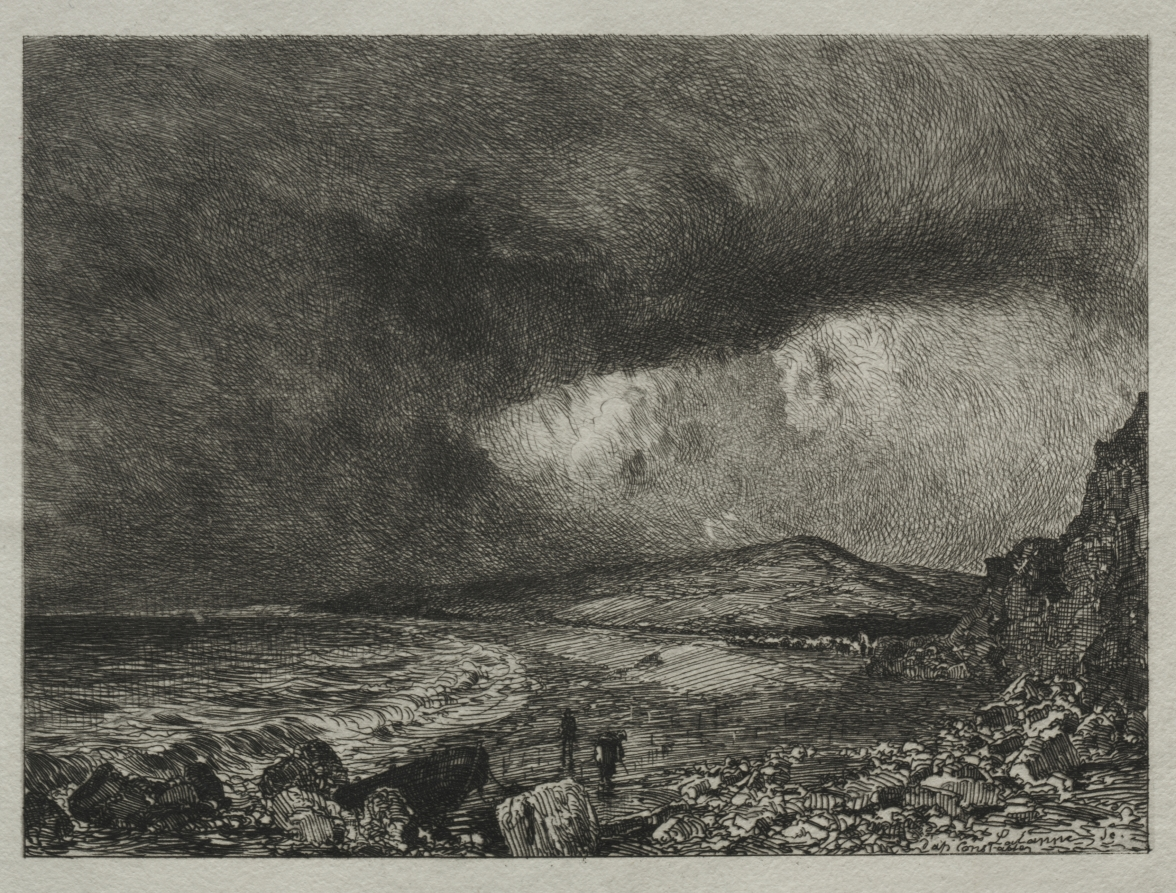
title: The Bay of Weymouth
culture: France, 19th century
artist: Maxime Lalanne (French, 1827–1886)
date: 1873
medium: etching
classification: Print